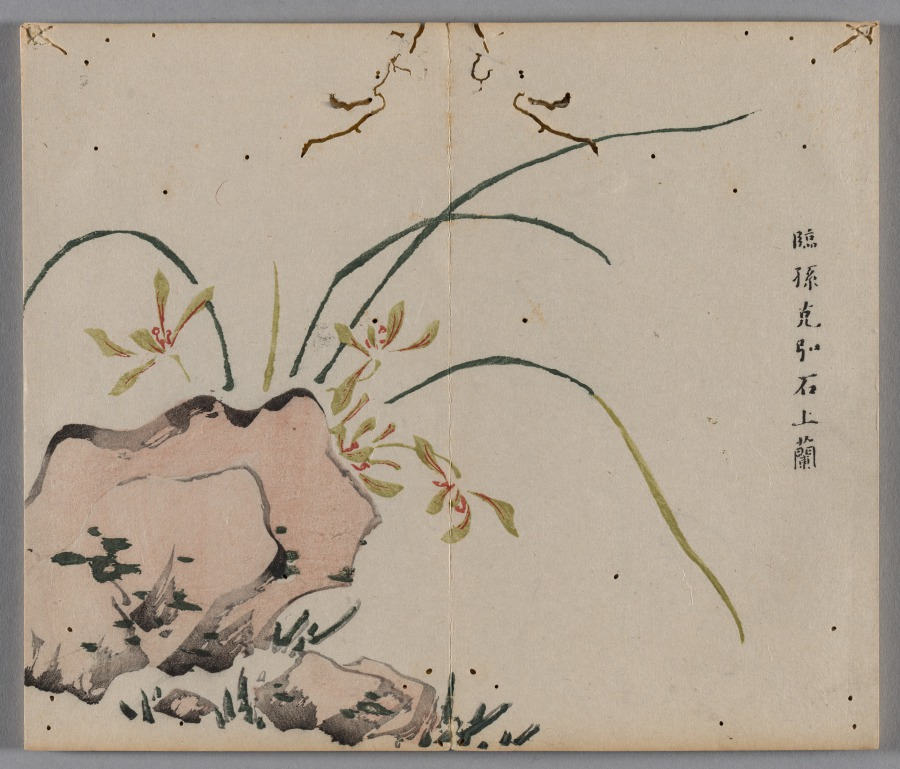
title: Ten Bamboo Studio Painting and Calligraphy Handbook (Shizhuzhai shuhua pu): Orchids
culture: China, Qing dynasty (1644-1911)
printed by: Hu Zhengyan (Chinese, c. 1584–1674)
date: 1633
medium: Woodblock-printed book; ink and colors on paper; first edition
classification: Print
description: Color printing reached a level of perfection in the early 1600s, as seen in this Ten Bamboo Studio Collection of Calligraphy and Painting and the Mustard Seed Garden Manual of Painting (printed 1679 and 1701). The painterly quality, precision in registering (aligning) the woodblocks, and harmonious colors made them the most successful color print editions in Chinese history. Both editions were printed and compiled in Nanjing, spread nationwide, and had a great impact on the arts in Japan and Korea.